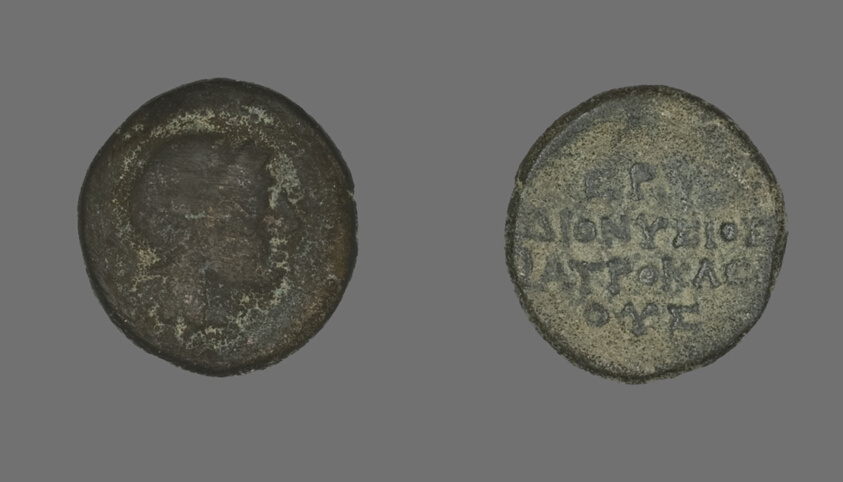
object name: Coin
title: Coin Depicting the Goddess Athena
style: greek, ancient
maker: Greek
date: 300-200 BCE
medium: Bronze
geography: Ancient Greece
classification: coin; ancient art